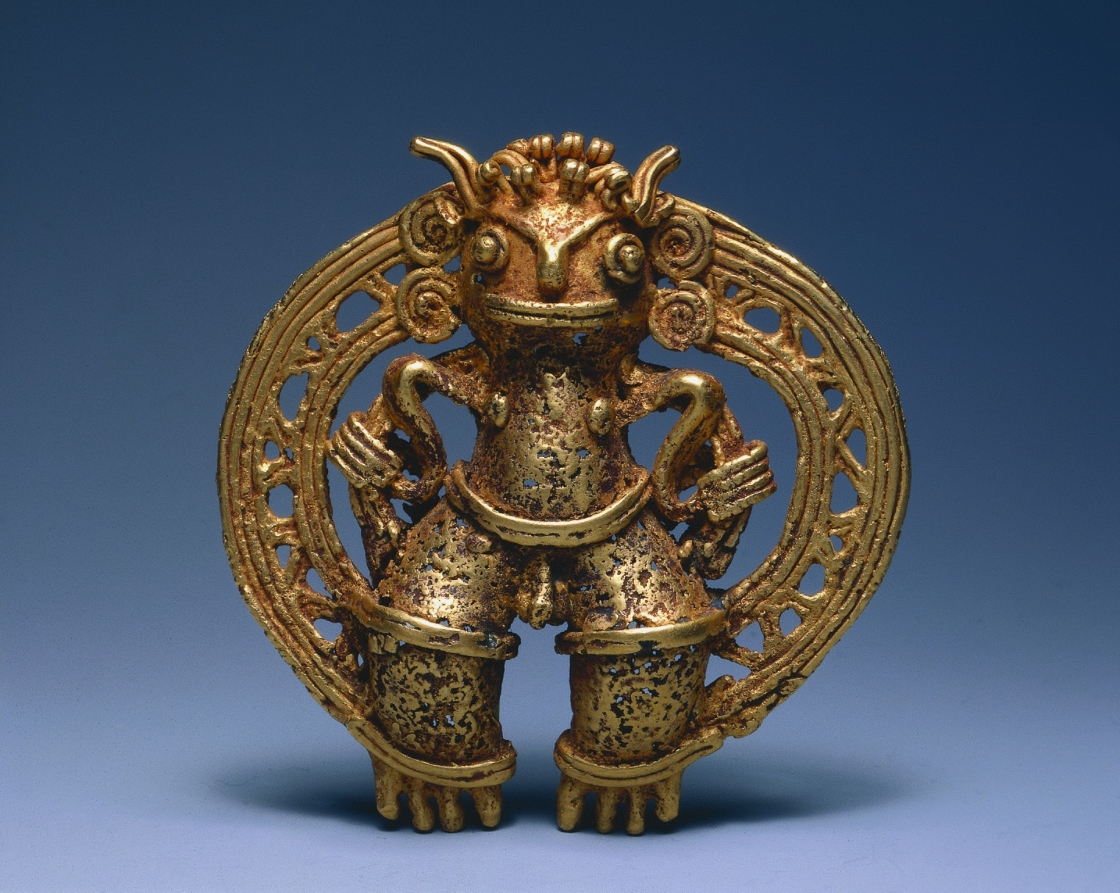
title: Figure Pendant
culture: Southern Costa Rica, (Diquís Region), Diquís Style, 11th-16th century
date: c. 1000–1550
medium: cast gold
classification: Metalwork